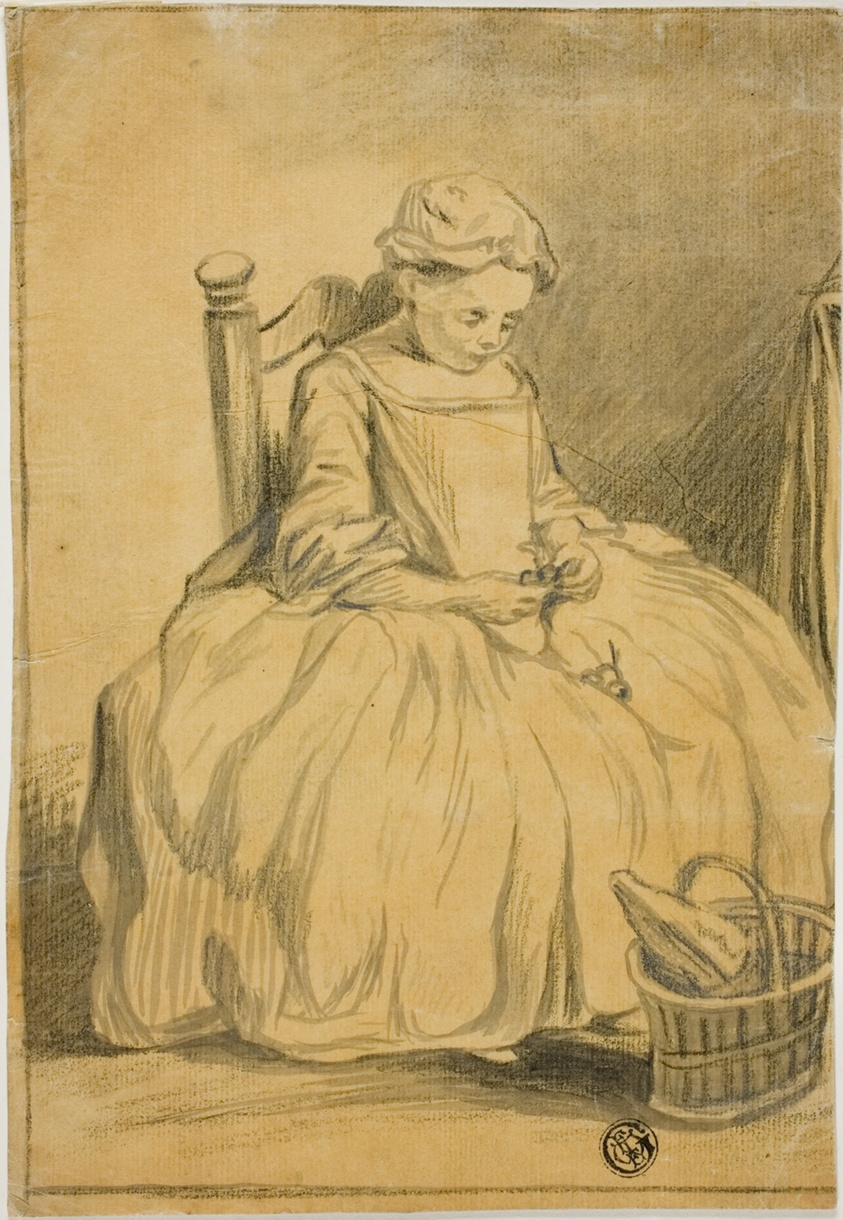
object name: Drawing and Watercolor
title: Girl Eating Cherries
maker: After Jean Baptiste Siméon Chardin; French, 1699-1779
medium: Black chalk and graphite with brush and gray wash, on tan laid paper, laid down on buff laid paper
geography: France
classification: ink or chalk wash; drawings (visual works); prints and drawing